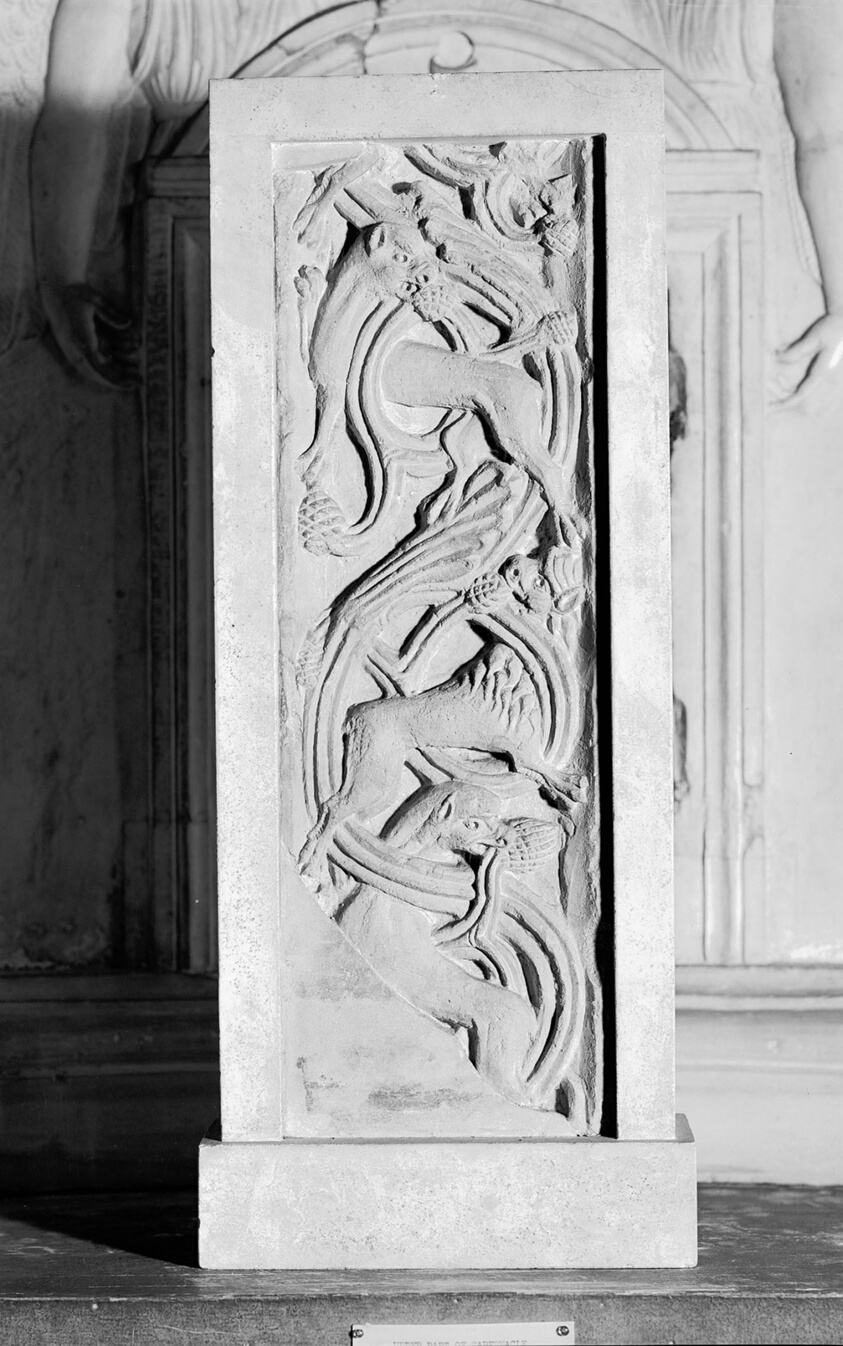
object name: Sculpture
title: Fragment of Animal Frieze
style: medieval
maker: Italian; Lombardy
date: 1100/50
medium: Limestone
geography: Lombardy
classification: architectural sculpture; sculpture; architectural fragment; architecture; Italian; limestone; sculpture/stone; stone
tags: animals, architechture, architectural, architectural fragment, architectural fragments, architecture, architecture, frieze